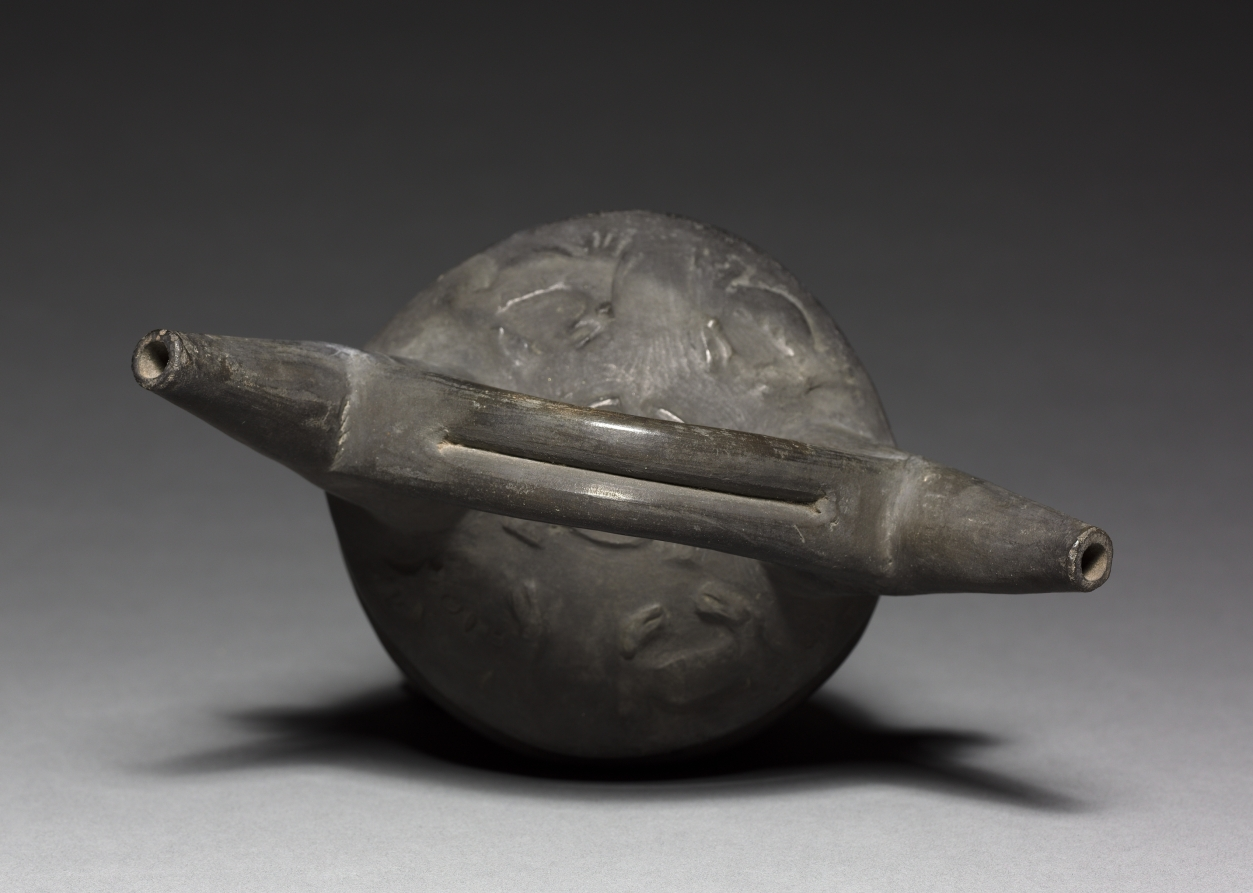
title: Vessel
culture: Peru, Chimú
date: 1300–1400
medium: black ware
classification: Ceramic